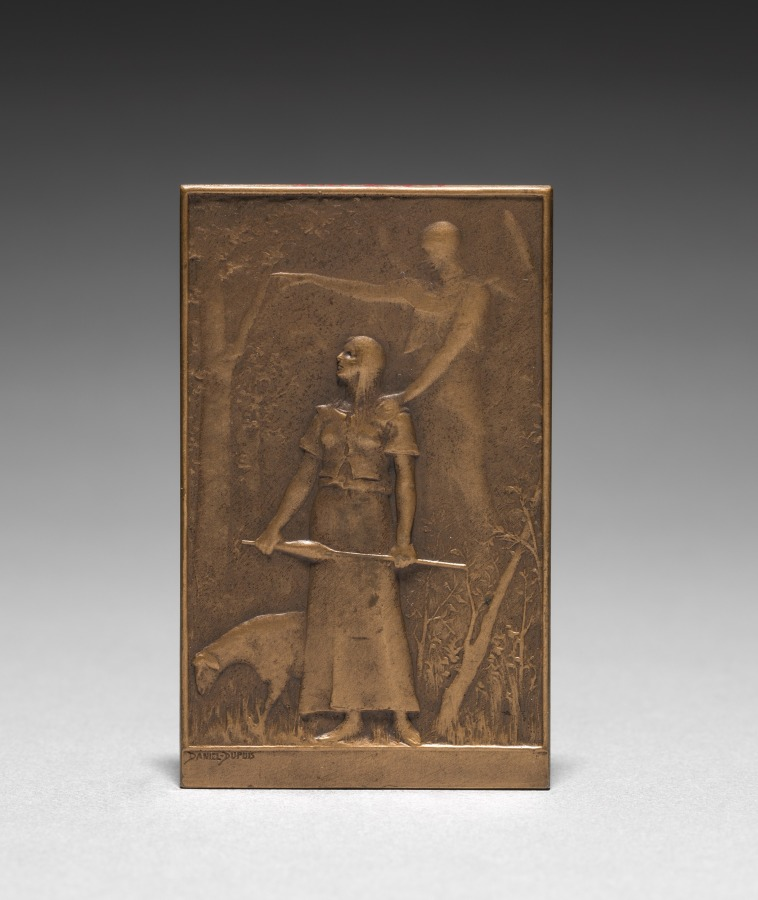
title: Medallion: Jeanne d'Arc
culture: France, 19th century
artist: Daniel Dupuis (French, 1819–1899)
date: c.1900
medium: bronze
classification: Metalwork